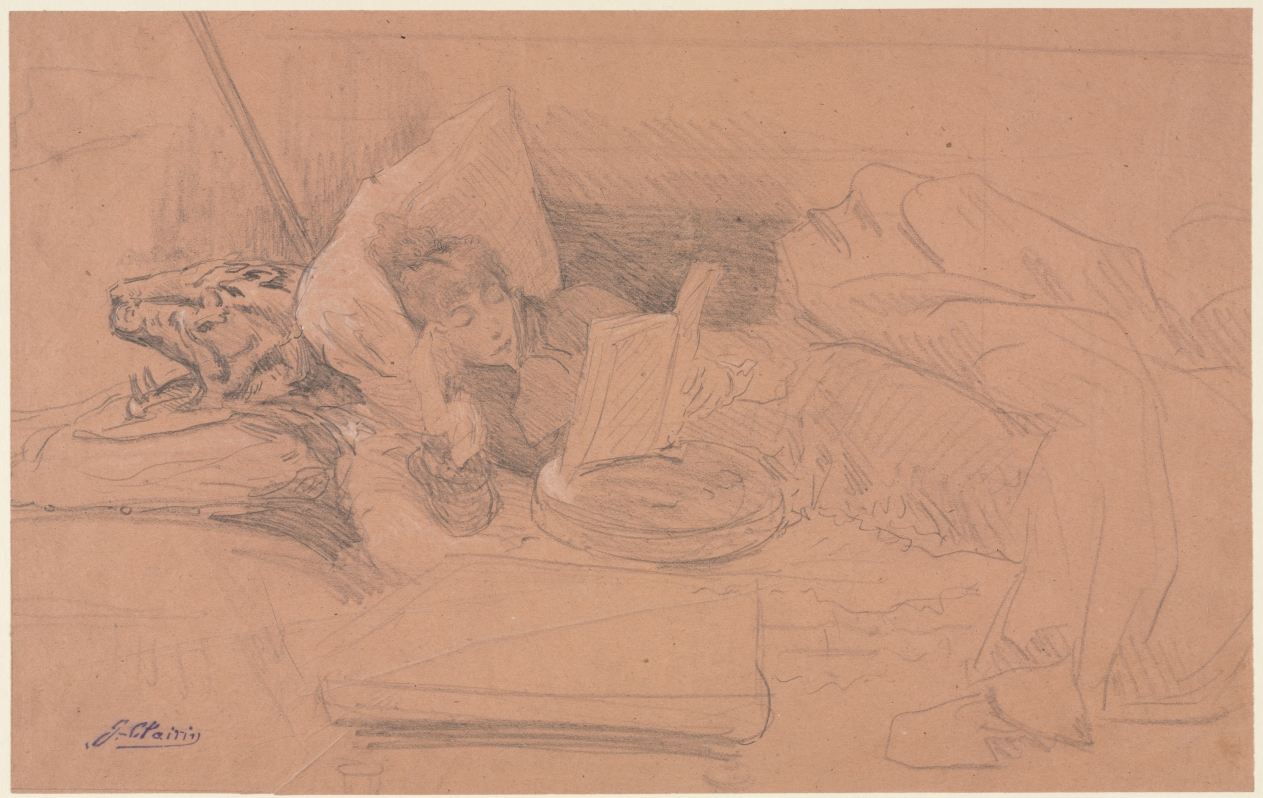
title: Sarah Bernhardt Reclining on a Divan, Reading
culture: France, 19th century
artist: Georges-Jules-Victor Clairin (French, 1843–1919)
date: c. 1885–1890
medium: Graphite with lead white heightening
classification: Drawing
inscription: inscribed in blue ink, lower left: "J-. Clairin (artist's stamp) (Lugt 448)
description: Perhaps the most famous actress in the history of the theater, Sarah Bernhardt (1844-1923) was one of the most magnetic personalities of her time and was known by her adoring fans as "the Divine Sarah." Jules Clairin was the favored portraitist of the actress, and depicted her in various roles in more than 100 paintings. In this intimate drawing, the international idol is depicted off stage, probably in her exotically decorated Parisian atelier that overflowed with lush palms, patterned carpets, fringed throws, and Asian bibelots. Quiet in her reverie, the reclining Bernhardt is supported by a tiger skin, the drama of her life momentarily voiced by the roaring animal.